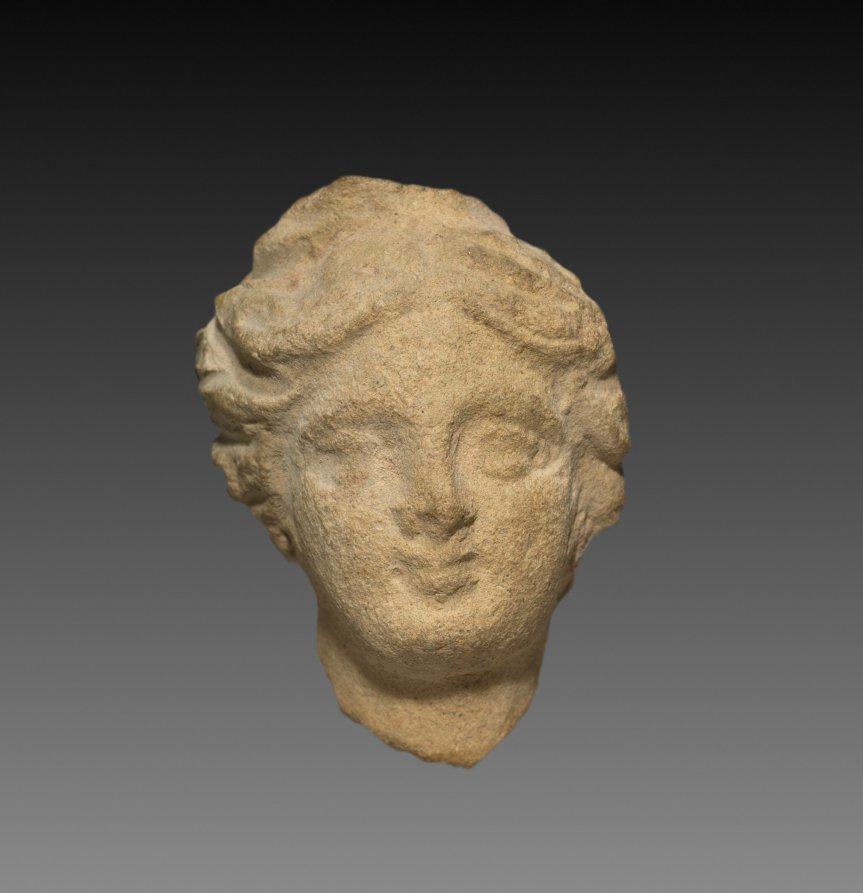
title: Head of a Girl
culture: Parthian Empire (247 BCE–224 CE)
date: 1–200 CE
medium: terracotta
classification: Sculpture